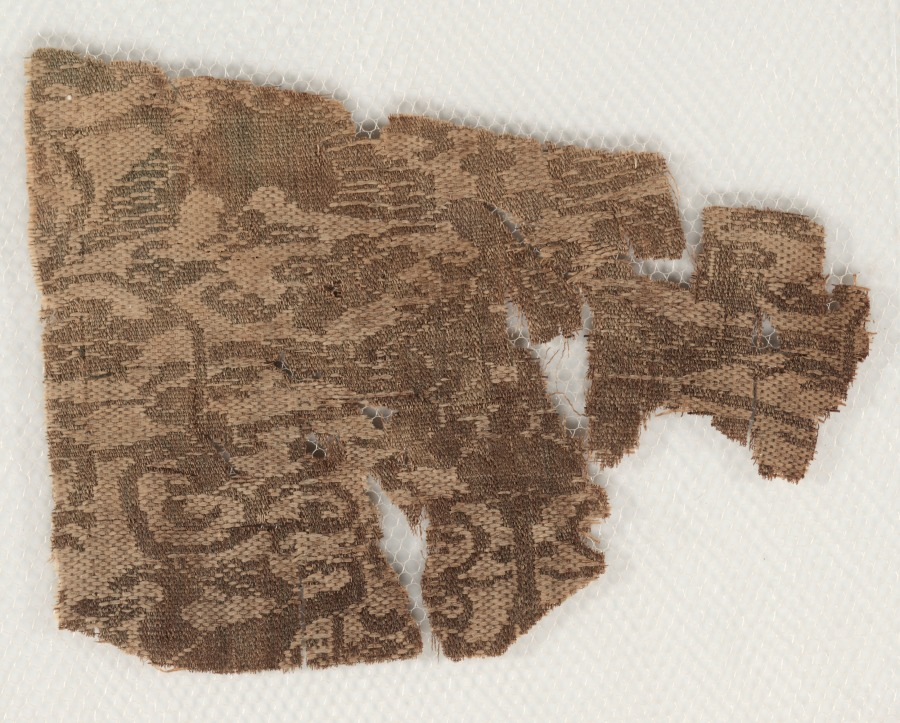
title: Fragment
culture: Egypt, Ayyubid, 12th century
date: 1100s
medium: tabby with supplementary weft; silk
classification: Textile